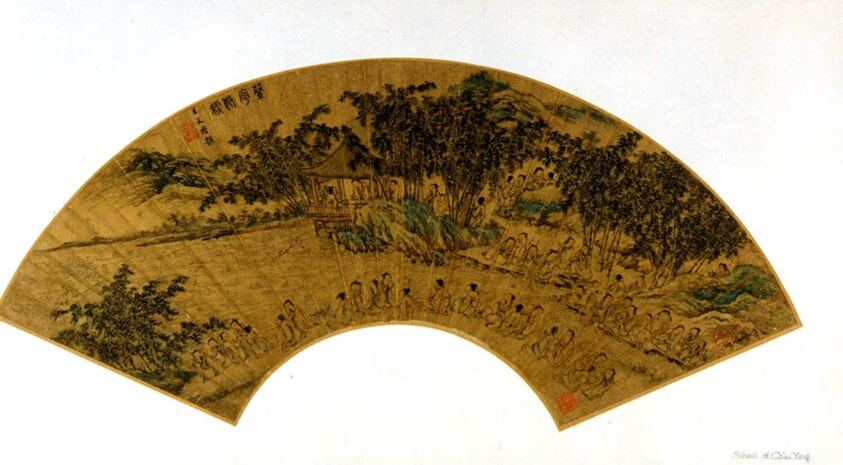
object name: Painting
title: The Gathering at the Orchid Pavilion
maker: Artist unknown; Spurious attribution to Qiu Ying (Chinese,1495-1551)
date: Qing dynasty (1644–1911)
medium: Folding fan mounted as an album leaf; ink and color on gold paper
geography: China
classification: album leaf; painting; asian art